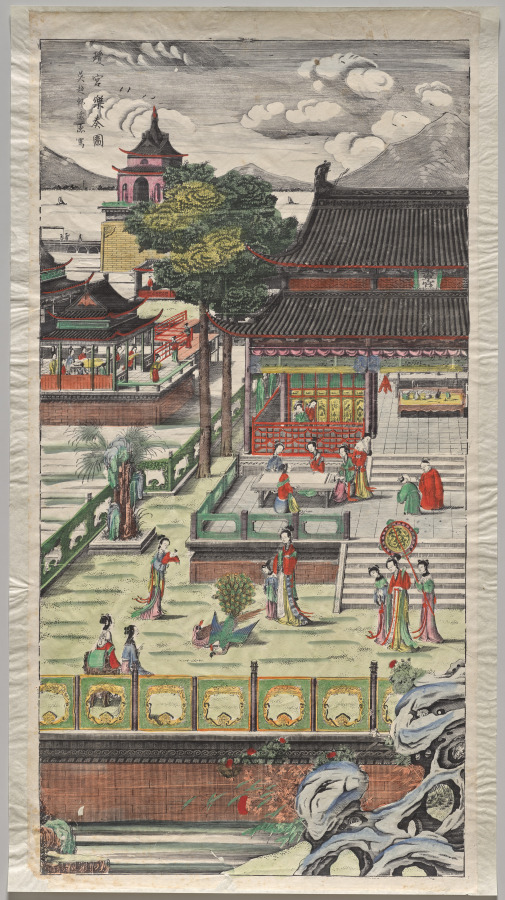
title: Music in the Jade Palace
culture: China, Qing dynasty (1644–1911), Qianlong reign (1736–95)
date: 1736–95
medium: Polychrome woodblock print; ink and color on paper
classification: Print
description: In the 1600s, printing flourished in such Jiangnan cities as Nanjing, Suzhou, Hangzhou, and Huizhou, evolving from privately enjoyed illustrated books printed in color to more commercialized single-sheet color prints that were hung on walls and became part of the rich urban visual culture.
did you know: Woodblock printing in color reached a height in China in the 1600s to 1700s. The prints were executed by means of sets of separate blocks, each carved to print a different color.